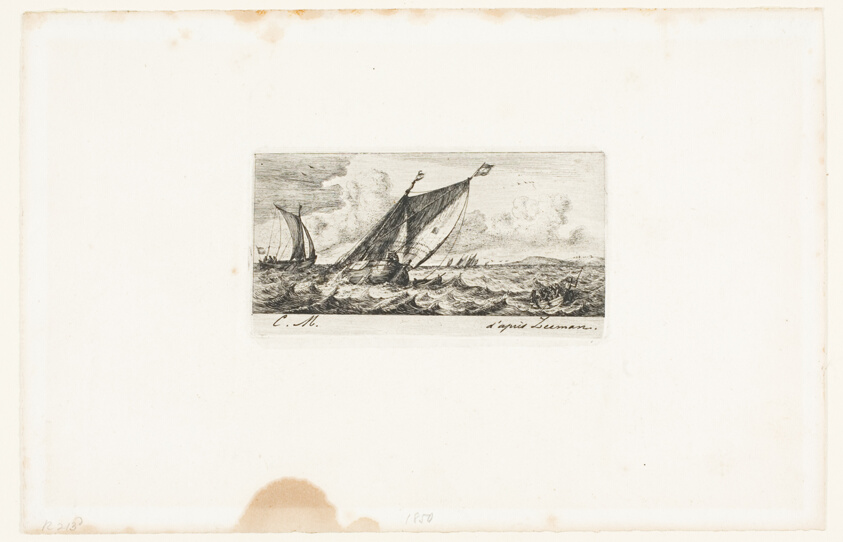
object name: Print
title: Haarlem Boats in Amsterdam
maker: Charles Meryon (French, 1821-1868); after Reinier Nooms (Dutch, c. 1623-c. 1664)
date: 1850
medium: Etching, engraving and roulette on ivory chine, laid down on ivory wove paper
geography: France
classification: etching; print; prints and drawing